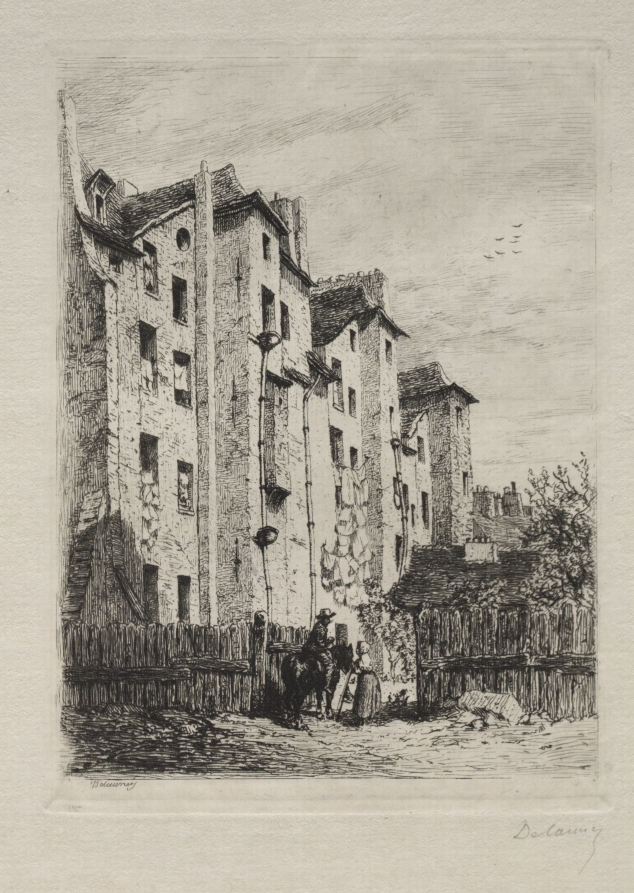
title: Maisons, Rue de Lyonnais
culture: France, 19th century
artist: Alfred Alexandre Delauney (French, 1830–1894)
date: c. 1870–94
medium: etching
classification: Print